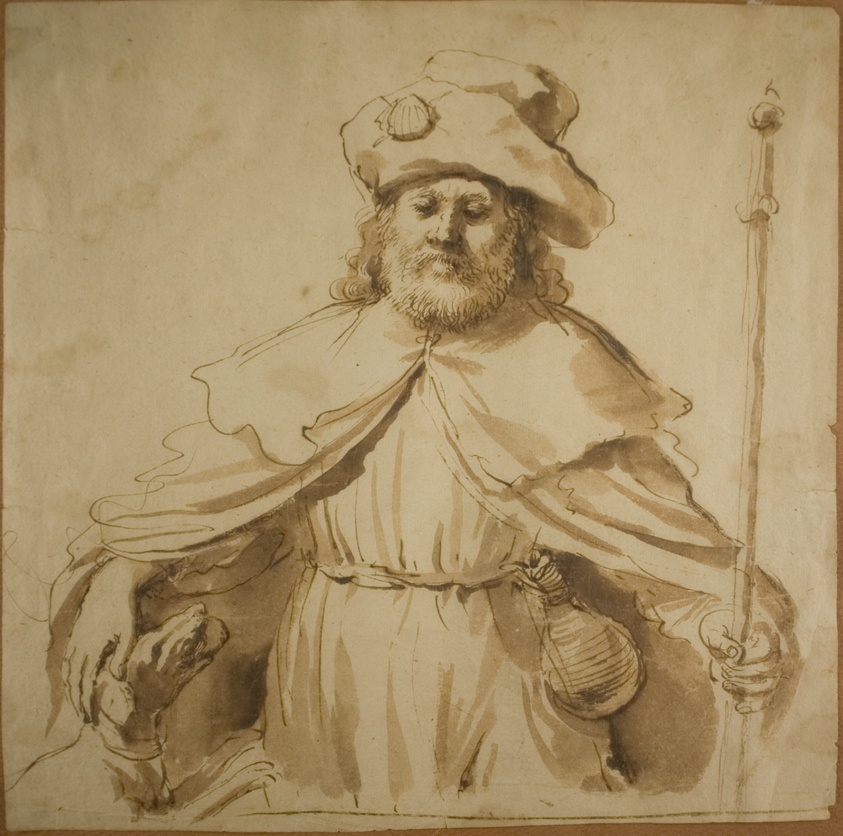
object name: Drawing and Watercolor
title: Saint Roch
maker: Giovanni Francesco Barbieri, called Il Guercino; Italian, 1591–1666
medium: Pen and brown iron gall ink with brush and brown wash on cream laid paper, tipped to brown wove paper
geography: Italy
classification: drawings (visual works); prints and drawing